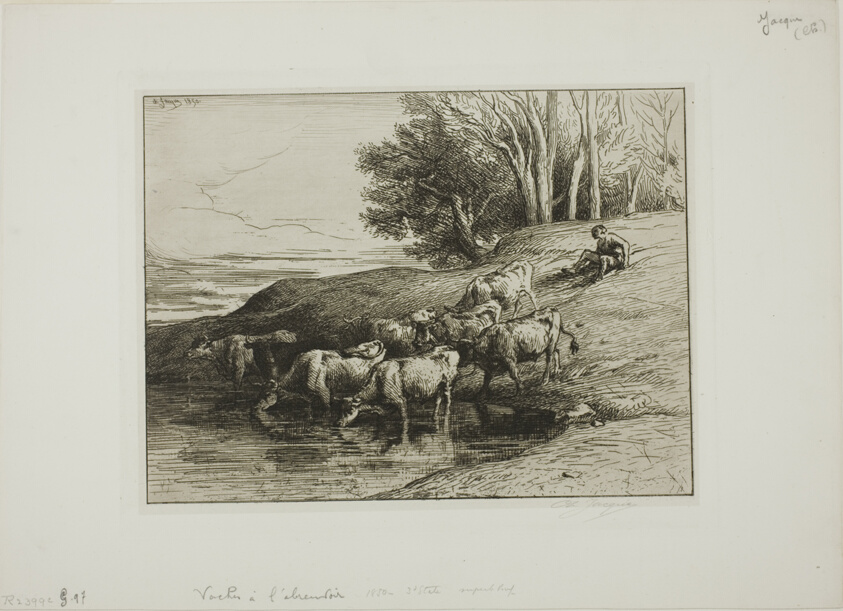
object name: Print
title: Cows at the Watering Place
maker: Charles Émile Jacque (French, 1813-1894)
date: 1850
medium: Etching, drypoint and roulette on cream China paper collè laid down on ivory wove paper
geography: France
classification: etching; print; prints and drawing